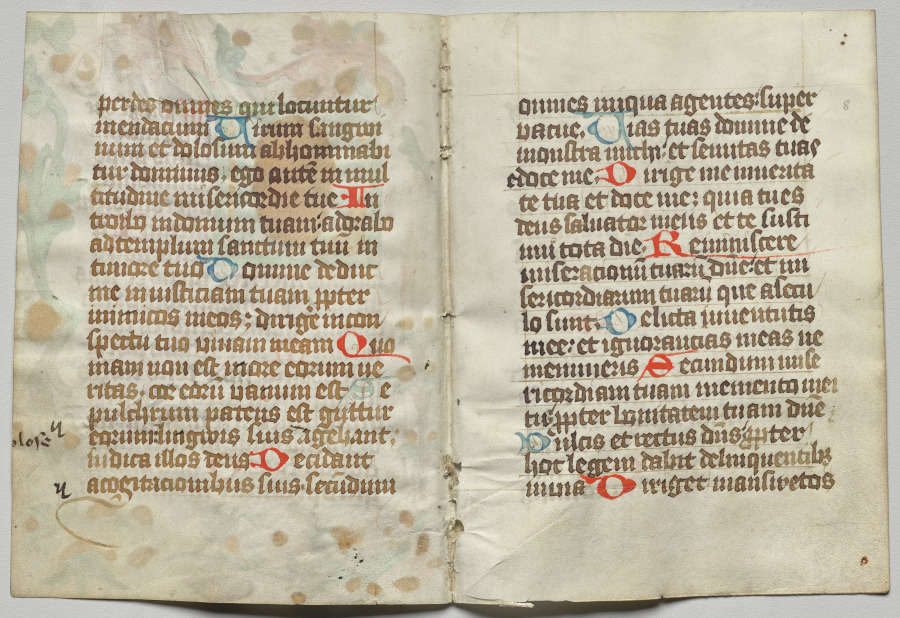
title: Bifolio from a Book of Hours: Text (verso)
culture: Austria (? ) or Bohemia (?), 15th century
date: c. 1460–1500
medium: ink, tempera and gold on vellum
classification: Manuscript